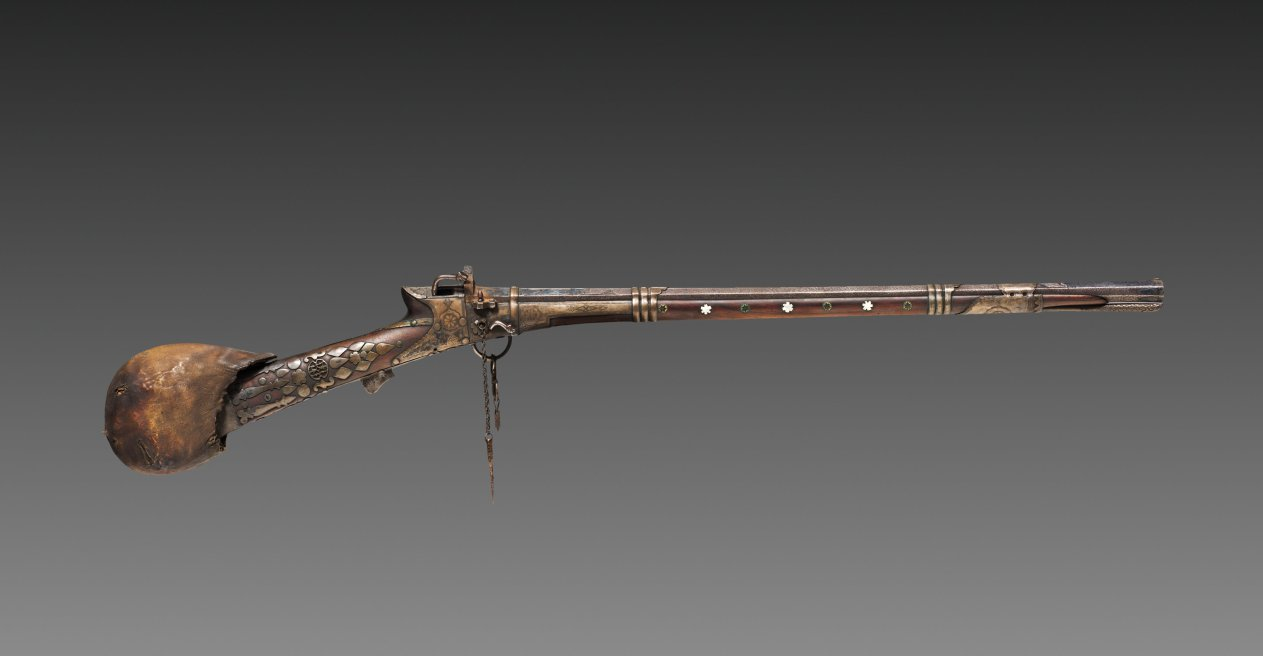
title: Matchlock Musket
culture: Turkey, Ottoman period (1299–1922)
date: c. 1750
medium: Wood, steel, brass, mother-of-pearl inlay, and leather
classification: Arms and Armor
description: Collectively, the Safavid, Mughal, and Ottoman empires are known as the Gunpowder Empires. Particularly from the 1500–1700s, they were among the strongest economic, cultural, and militaristic powers. Each trained and equipped their armies with the latest gunpowder firearms, particularly cannons and muskets. While used in battle, muskets were also used for leisure activities, particularly hunting. The decoration on this musket suggests it was a courtly item, fitted with a leather pad to protect the shooter from the force of the explosion after firing.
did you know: A matchlock musket was loaded from the muzzle end with a scouring stick kept in a sleeve on the underside of the barrel.